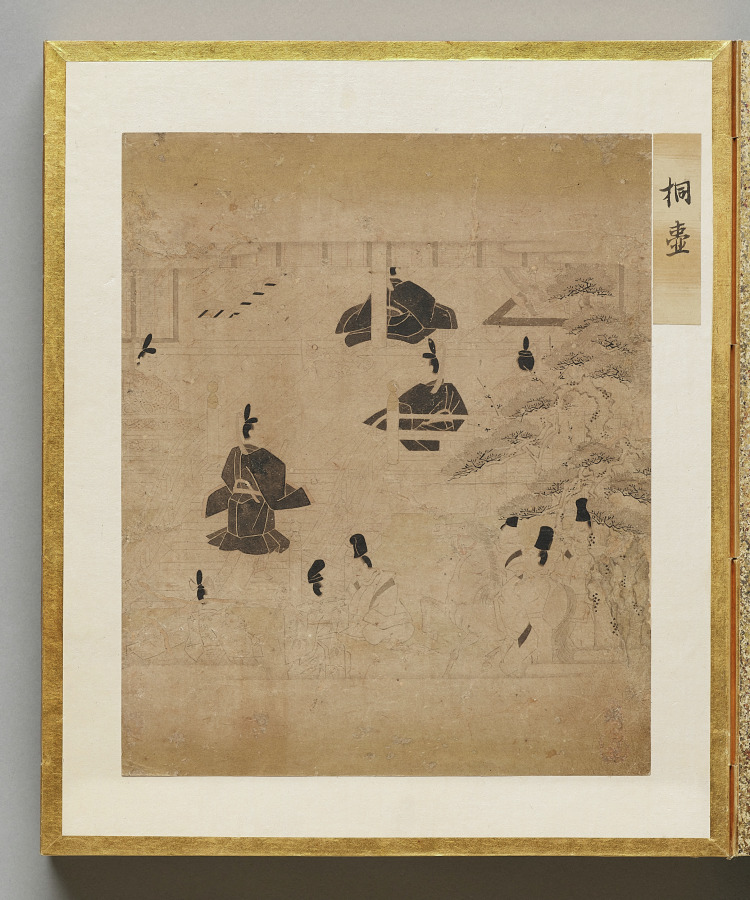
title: Paulownia Court from Album of Illustrations for the Tale of Genji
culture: Japan, Edo period (1615–1868)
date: 1600s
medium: painting in an accordion-style album; ink, light color, and gold on paper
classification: Bound Volume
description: This album contains illustrations for the classic literary work the Tale of Genji, authored in the 1000s by Murasaki Shikibu, an aristocrat of the Heian period (794–1185) court. The scenes are painted in the “white drawing” (hakubyō) mode, in which a fine ink line is used to depict figures and spaces with great subtlety, punctuated only occasionally by traces of red pigment for a character’s lips, a detail of a garment, or a decorative element. These two scenes illustrate episodes from the chapters “Thin Veil of Cloud” (Usugumo) and “Barrier Gate” (Sekiya).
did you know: The illustrations are identified by chapter title in cartouches to the upper right of the paintings.